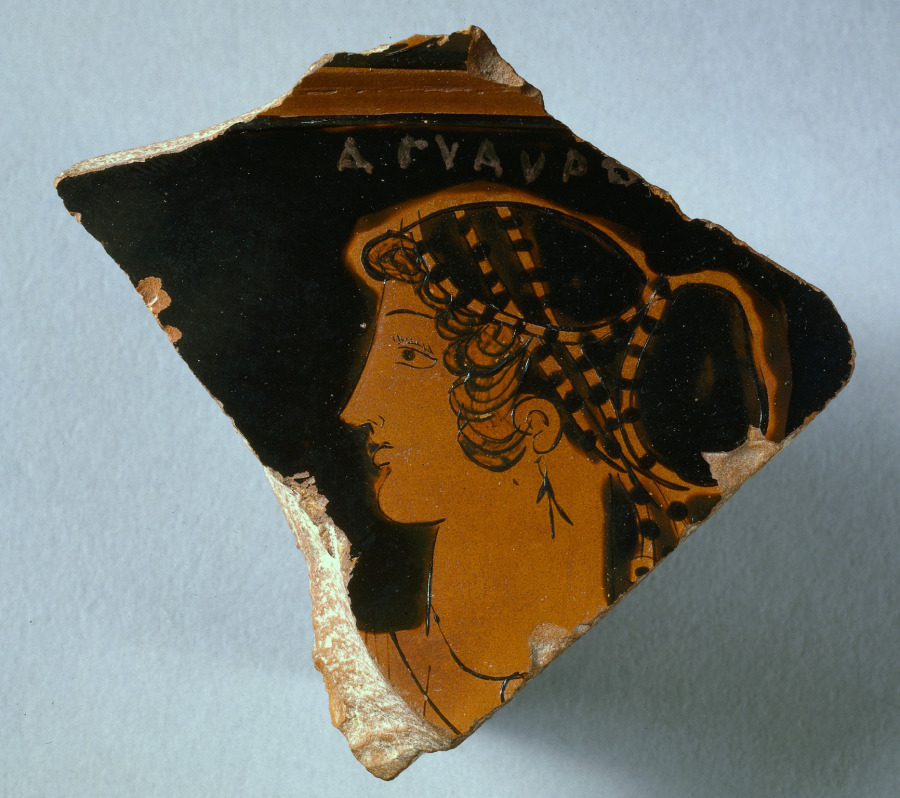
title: Fragment of a Red-Figure Bell-Krater or Calyx-Krater (Mixing Vessel): Female Head (Aglauros)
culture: Greek, Attic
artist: attributed to Nausicaa Painter (also known as Polygnotos III; Greek, Attic, active c. 460–440 BCE)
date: c. 460–450 BCE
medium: ceramic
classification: Ceramic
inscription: inscription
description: Broken from the upper wall of a large mixing vessel, this fragment shows the head of a woman wearing an earring and an elaborate ribbon in her hair. A faint inscription identifies her as Aglauros, a daughter of Kekrops, the mythical first king of Athens. Although worshipped in a shrine near the Acropolis, Aglauros appears quite rarely in Athenian art, usually with her sisters at the birth of Erichthonios, a future king.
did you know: An inscription identifies this woman as Aglauros, an Athenian princess.